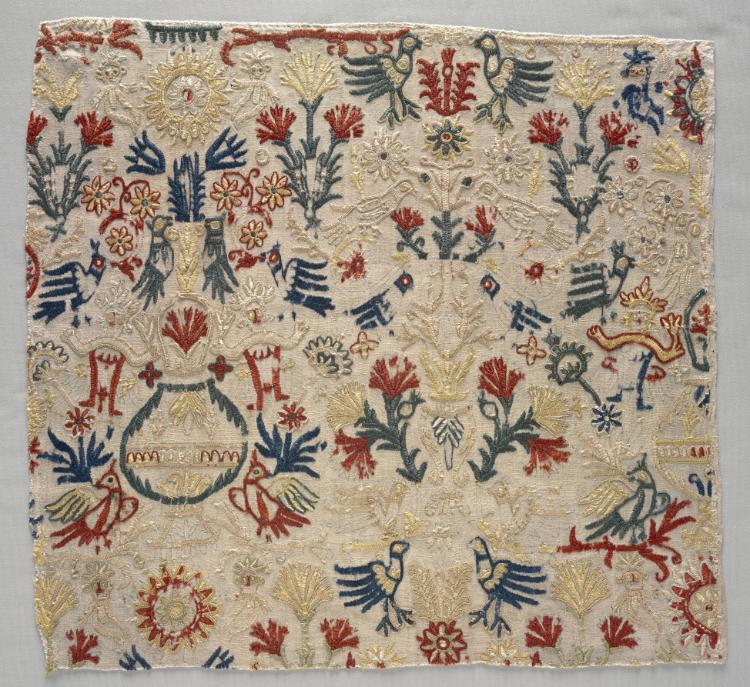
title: Fragment of a Bed Curtain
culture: Greece, Crete, 18th century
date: 1700s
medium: embroidery: silk on linen tabby ground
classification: Embroidery